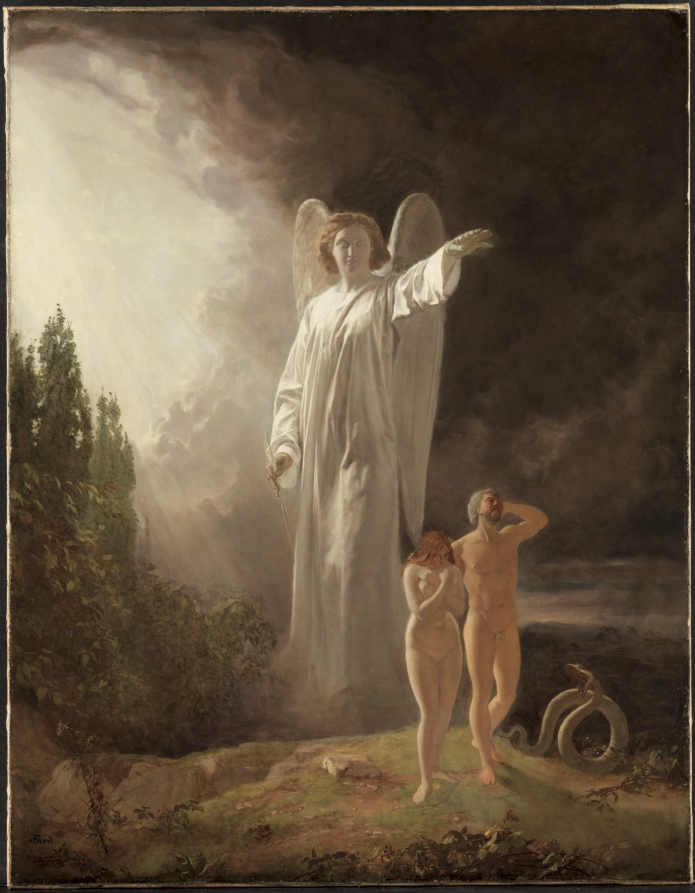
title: Expulsion of Adam and Eve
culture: Scotland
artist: John Faed (Scottish, 1820–1902)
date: 1880s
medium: oil on fabric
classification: Painting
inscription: Signed lower left: JJF.aed [JF in monogram]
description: John Milton's epic poem Paradise Lost (1667) was the principal literary source for John Faed's depiction of the expulsion of Adam and Eve. The archangel Michael directs the couple away from the lush gardens and heavenly radiance of Eden, while Satan in the form of a snake appears in the right foreground. In most representations of the subject, Michael guards the gates of Paradise with a fiery sword, as prescribed in both Genesis and Paradise Lost. Faed, on the other hand, has him brandishing a compass, an instrument traditionally employed by God the Father in his act of creating the world.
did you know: A renewed interest in religious art in mid-19th-century Britain led John Faed to visit Palestine in 1857.